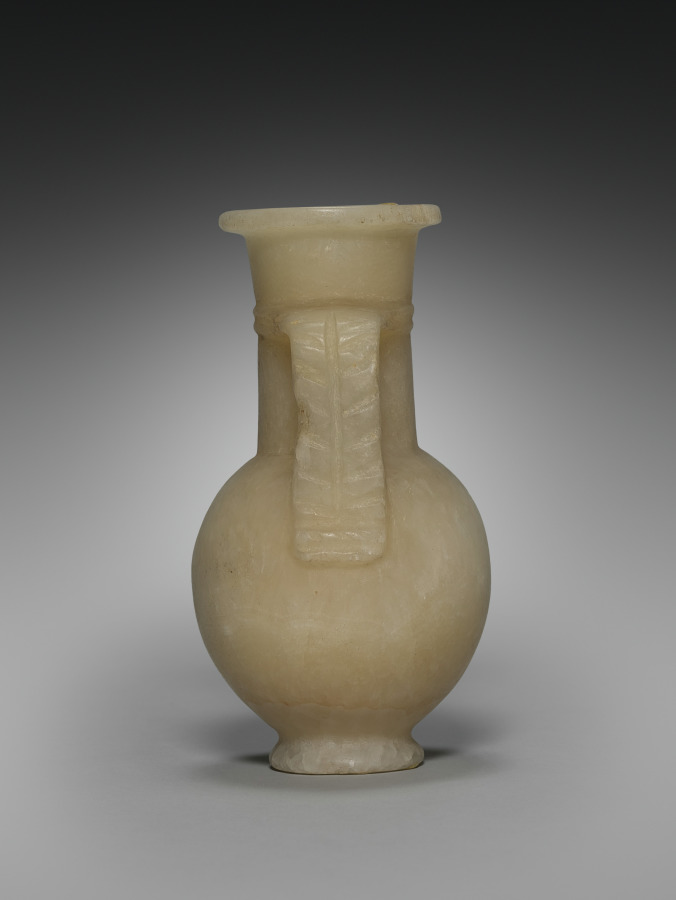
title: Long-Necked Flask with Strap Handle and Lid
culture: Egypt, New Kingdom (1540–1069 BCE), Dynasty 18, reign of Tuthmosis III (1479–1425 BCE)–reign of Amenhotep III (1390–1352 BCE)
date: 1401–1353 BCE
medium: travertine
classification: Vessels